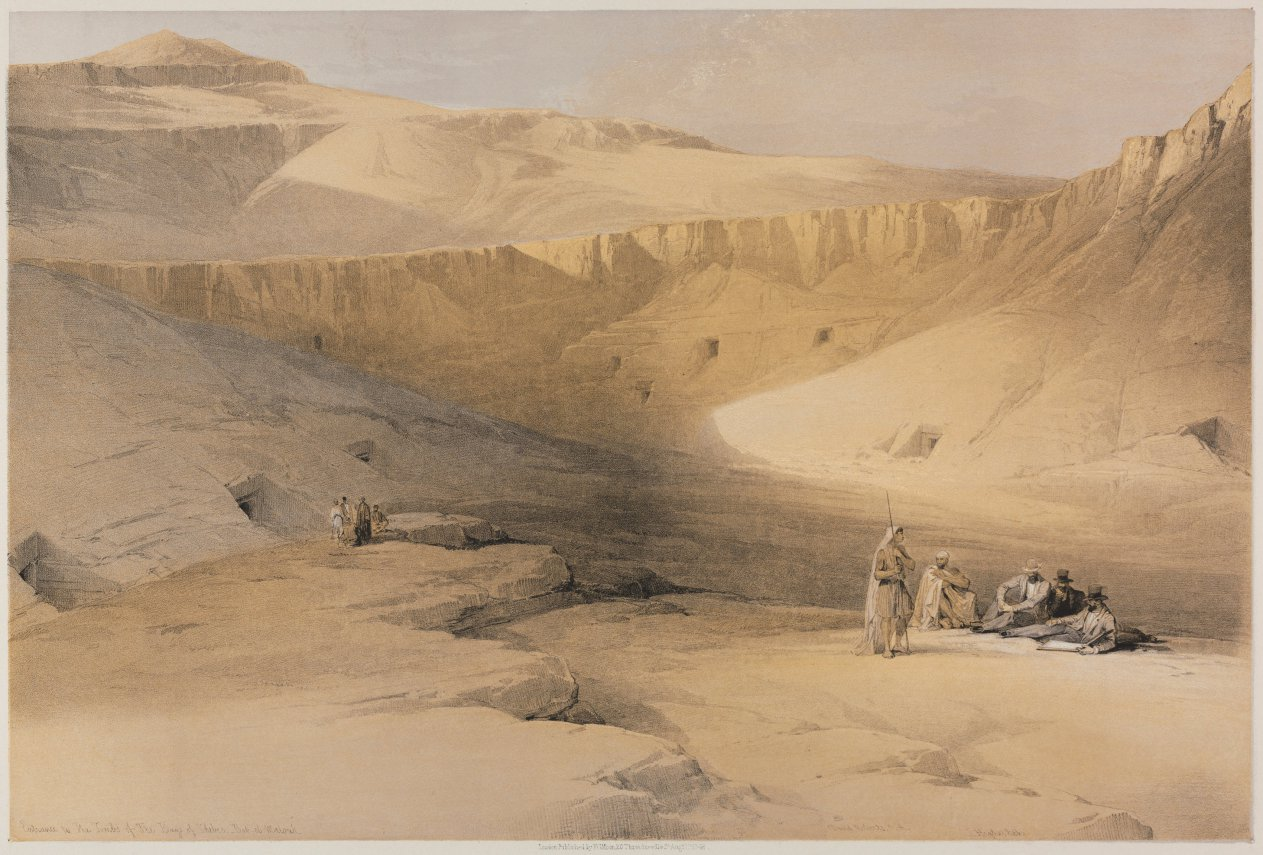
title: Egypt and Nubia, Volume II: Entrance to the Tombs of the Kings of Thebes, Bab-El-Malouk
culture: England, 19th century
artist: Louis Haghe (British, 1806–1885)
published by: F. G. Moon, 20 Threadneedle Street, London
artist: after David Roberts (Scottish, 1796–1864)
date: 1848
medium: color lithograph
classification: Print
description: By the mid-19th century, the complexities of printing in numerous colors had been mastered, culminating in one of the high points of European printmaking. The plates drawn by Haghe, which copy the watercolors that David Roberts made in Egypt, are exquisite examples of color lithography. Egypt was a distant, mysterious country for Europeans and Haghe, a Scottish topographical and architectural artist who spent the year of 1838 traveling across this ancient land. The resulting prints—the first comprehensive series of views of the monuments, landscapes, and people of the Near East—were especially appreciated for their brilliant color and large scale.